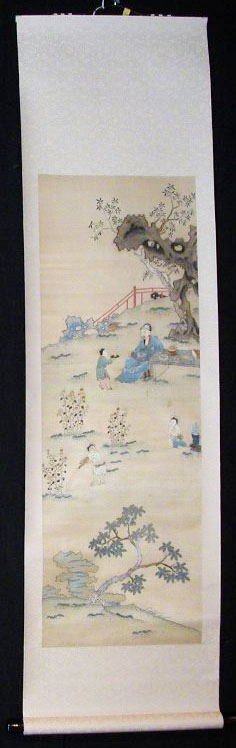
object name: Textile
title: Scroll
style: qing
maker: China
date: Qing dynasty (1644–1911), c. 1720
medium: Panel: silk, satin weave; embroidered with silk in Chinese knot, satin, single satin, and stem stitches; painted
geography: China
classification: textile; needlework (visual works); weaving